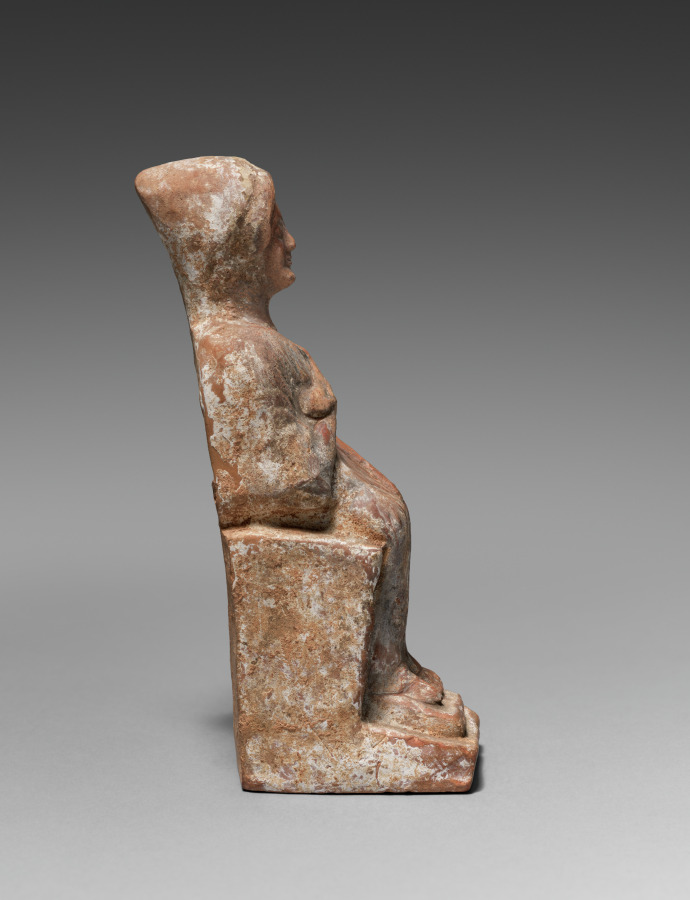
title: Archaic Figurine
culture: Greece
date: 500s BCE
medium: terracotta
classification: Sculpture